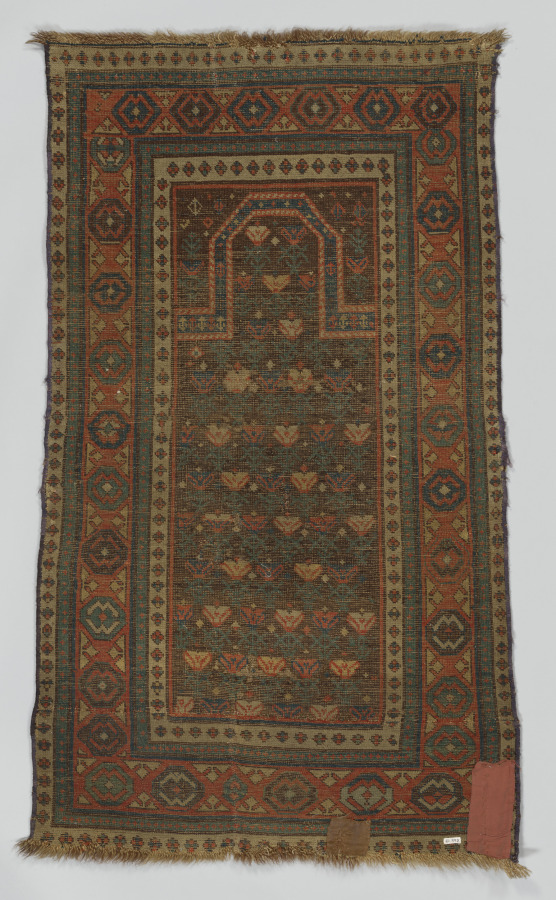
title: Carpet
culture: Iran, Shirvan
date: 1800s–1960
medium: Wool and cotton: Ghiordez knot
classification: Carpet